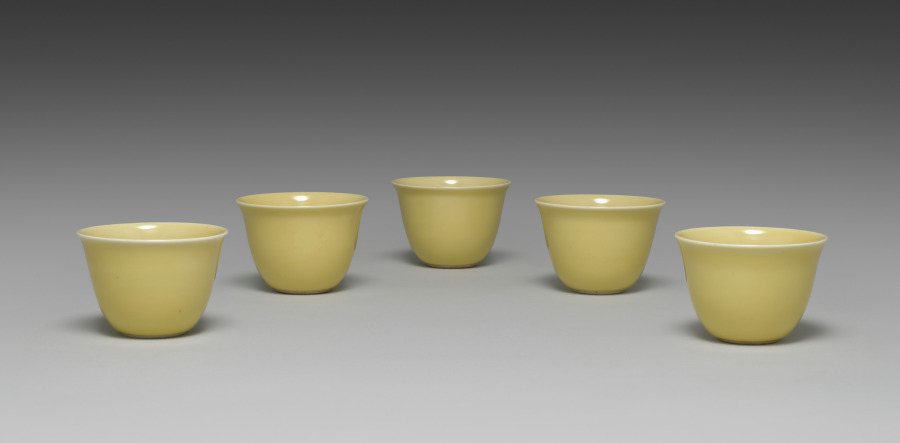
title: Cups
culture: Japan, Taishō period (1912–26) or Shōwa period (1926–89)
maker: Seifū Yohei IV (Japanese, 1872–1951)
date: 1914–46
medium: Set of five cups; porcelain with yellow glaze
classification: Ceramic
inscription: 清風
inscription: 清風造 【印】成山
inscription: 清風盧人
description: Like his father, Yohei IV also produced works with red or yellow monochrome glazes. His yellow-glazed works include this set of five drinking cups, a pair of sake pourers CMA 2022.216, and a sweets bowl molded into the shape of a chrysanthemum CMA 2022.218.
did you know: Seifū Yohei IV learned the ceramics industry from his father and painting from Tanomura Shosai.